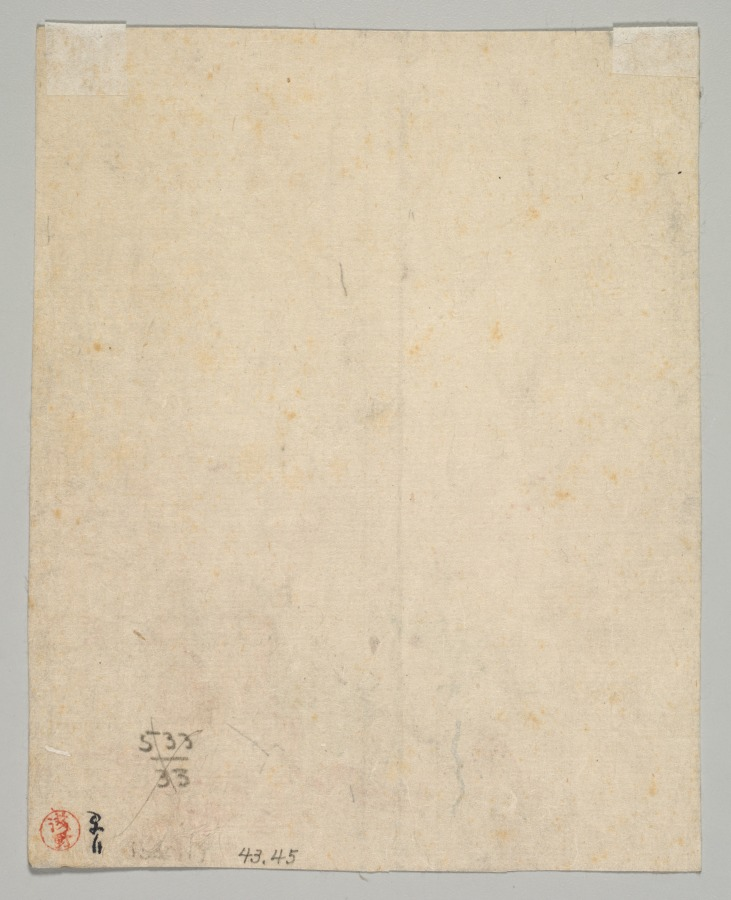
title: New Year's Scene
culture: Japan, Edo period (1615–1868)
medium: color woodblock print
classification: Print